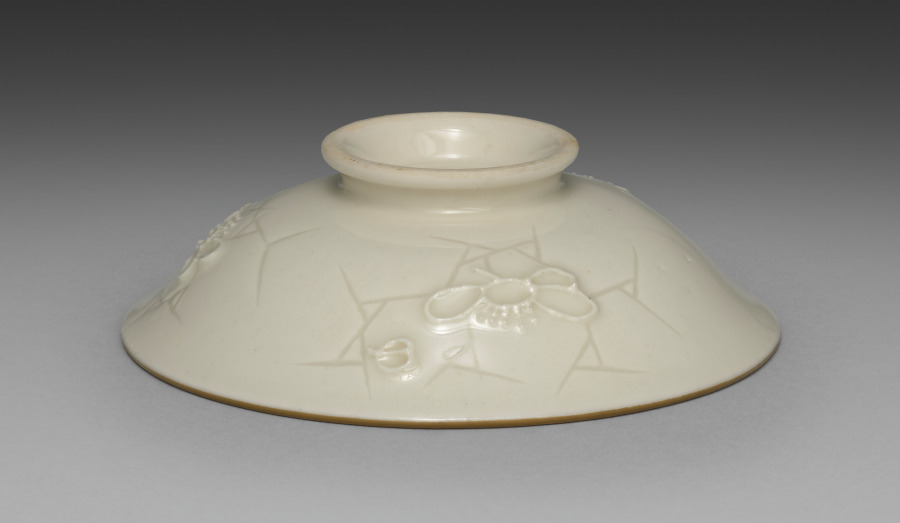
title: Cover for a Bowl from Dining Set with Plum Blossoms and Cracked-Ice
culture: Japan, Meiji period (1868–1912)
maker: Seifū Yohei II (Japanese, 1844–1878)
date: c. 1875–78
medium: Porcelain with molded designs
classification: Ceramic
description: Each item in this set has a delicate low-relief design of flowering plum branches over scattered, intersecting lines meant to resemble the cracked-ice surface of a frozen body of water and is signed on the base in gold pigment. While Yohei II produced many fine works in underglaze blue, like those produced by Kiyomizu Shichibei, he also made works in quite different styles later in his career, from the early 1870 s. In 1873, he was appointed purveyor to the Industrial Center of Kyoto Prefecture, a designation associated with Kyoto’s efforts to reach an international market through the port of Kobe; and from 1875 until his death, he was involved in national-level projects to present Japanese ceramics across the world. It was during this period that Yohei III was apprenticed to Yohei II, and it has been suggested that this set may in fact be an early example of Yohei III’s work, which he signed with his teacher’s name. Decorated with flowers resembling Japanese textile motifs, the set calls to mind the design of Yohei II’s pair of vases with plum blossoms in the Victoria and Albert Museum. Here, the elaborate trees created for a formal public exhibition setting have been translated into the approachable blossoms of the genteel domestic environment. While the designs are consistent across the pieces, each raised flower petal and pistil and each incised line in the ice was done by hand, so the cups, bowls, and dishes are similar yet unique. The bottoms of two boxes once identified the set’s owner, but the information has been deliberately obscured with black ink. However, inscriptions still visible appear to indicate two occasions, once at the end of July 1886 , and once again in June 1916 , when parts of the set were requested from Hokura in Niigata Prefecture. The location corresponds to a neighborhood in the present-day city of Jōetsu. The surname Tsuji 辻 also appears on a paper tag affixed to one of the box cloths. Future research may possibly reveal more about their provenance. A vase by Yohei III in a private collection combines the formal grandeur of the Yohei II vases in the Victoria and Albert Museum with the gentler design of this dining set, placing flowering plum trees against soft, scalloped-edge clouds resembling those in golden screens.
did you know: The dining wares have a creamy white coloration that the four boxes containing them identify as Korean in style.